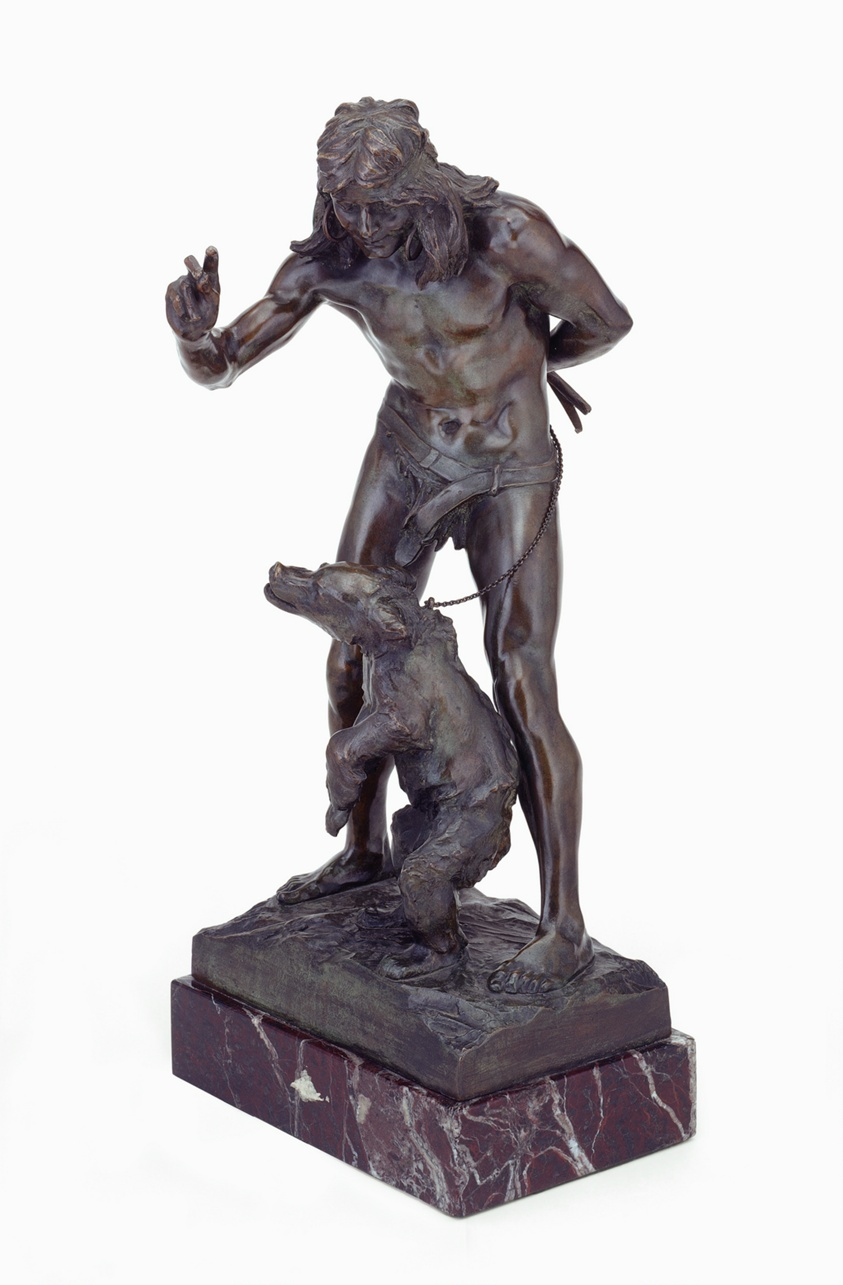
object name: Sculpture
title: The Bear Tamer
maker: Paul Wayland Bartlett (American, 1865–1925); Cast by Siot et Perzinka (French, 1888–c. 1891); or Siot-Decauville (French, c. 1891–1926)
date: Modeled 1885–87; cast 1887–97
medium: Bronze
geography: Paris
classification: sculpture; american arts